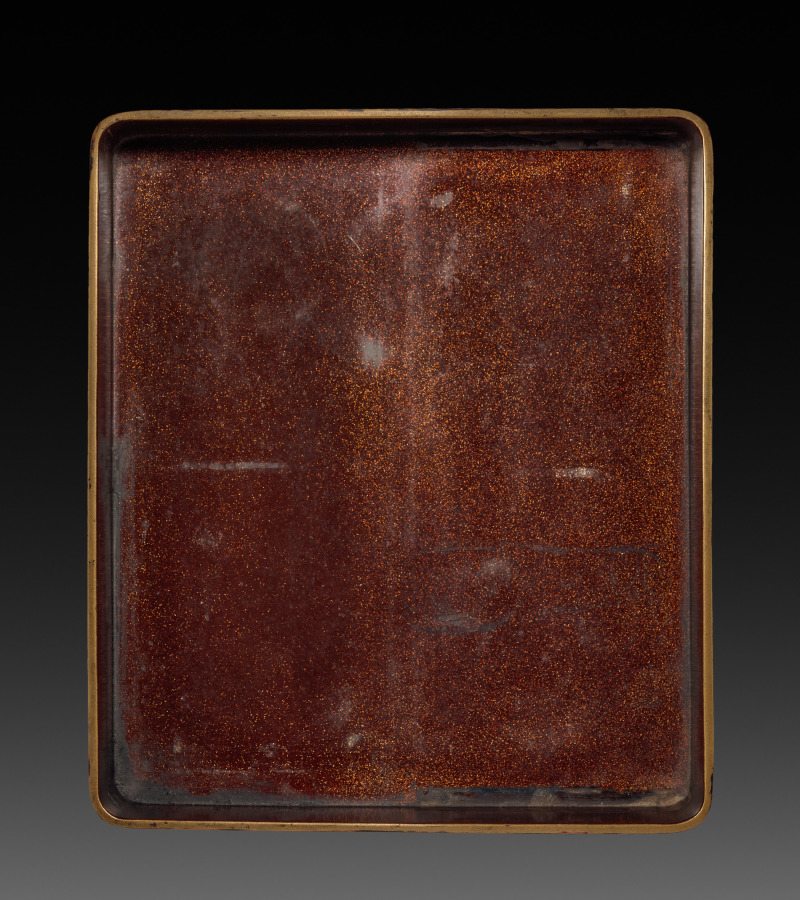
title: Writing Box (Suzuribako) with Phoenix in Paulownia (base)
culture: Japan, Momoyama period (1573–1615)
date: c. 1573–99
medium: Lacquer on wood with sprinkled gold and silver powder (maki-e) and gold and silver foil application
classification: Lacquer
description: The only place the mythical phoenix will perch is in the paulownia tree. Along with the dragon, the bird is a symbol of imperial power in East Asia. This box––a container for an inkstone, brushes, and ink––is both functional and lavish, its dramatic effects achieved with a pear-skin ground decoration (nashiji) and sprinkled powder decoration in high relief (takamaki-e).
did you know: In contrast to the bright, celebratory motifs on the exterior, the interior of the box invites a more reflective mood with its autumn moonlit sky over chrysanthemums.